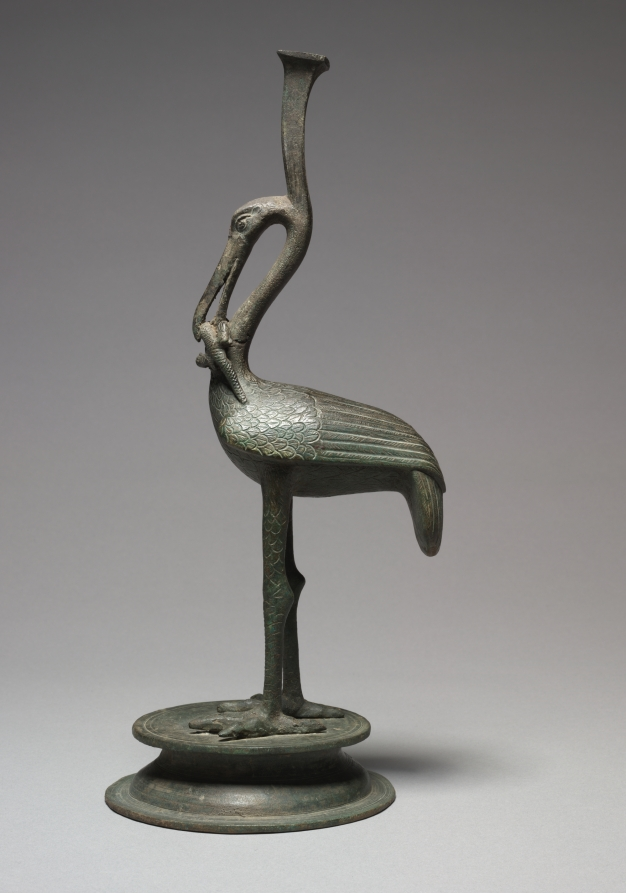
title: Ibis Eating a Lizard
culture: Italy, Rome, Roman Empire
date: 100 BCE–100 CE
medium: bronze, hollow cast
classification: Sculpture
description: The ibis is an Egyptian bird, shown here standing firmly on both legs with a lizard in its beak. The bird rests on a two-tiered circular base, and a vertical stem with incised decoration extends above the ibis’s head. While an Egyptian animal, the image of the ibis devouring a lizard became common only in the Roman world, depicted in wall paintings and seen on Barbotine ware, a type of pottery. This sculpture may be unique, however, in showing this motif in the round.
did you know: This sculpture was possibly used as a support for furniture, a candelabrum, or an incense burner.